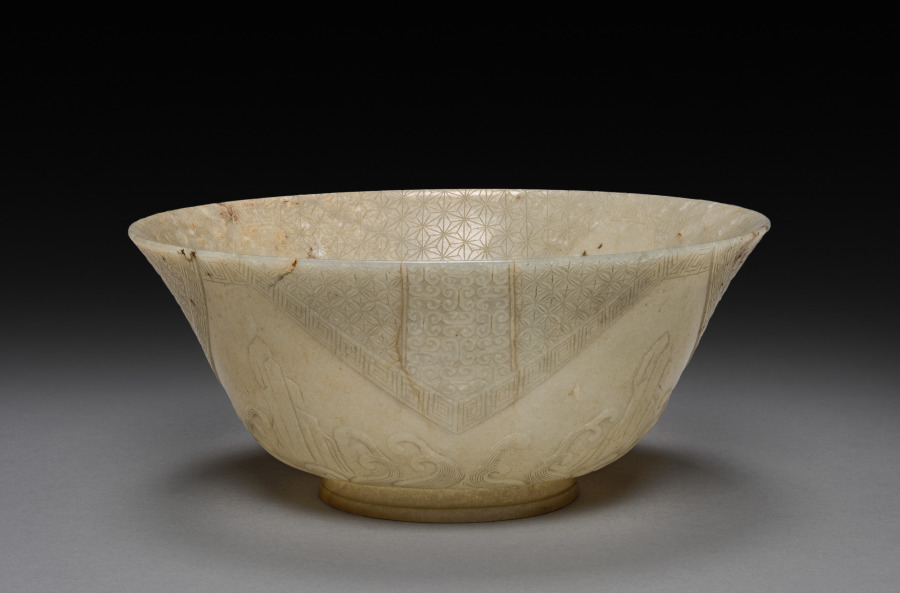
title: Bowl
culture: China, Qing dynasty (1644-1911), Kangxi reign (1661-1722)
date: 1662–1722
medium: jade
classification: Jade